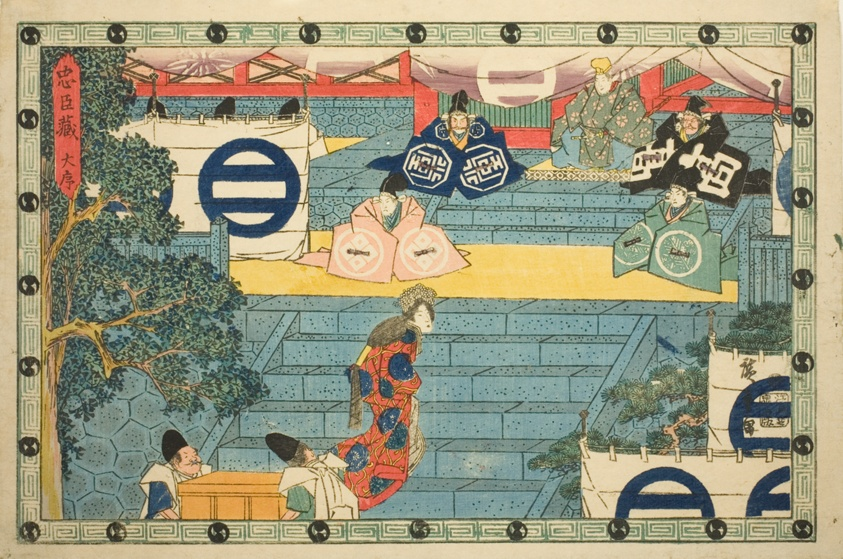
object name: Print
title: Act 1 (Daijo), from the series "The Revenge of the Loyal Retainers (Chushingura)"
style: Japanese (culture or style)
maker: Utagawa Hiroshige 歌川 広重; Japanese, 1797-1858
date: c. 1834/39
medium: Color woodblock print; oban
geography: Japan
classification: woodblock print; print; asian art